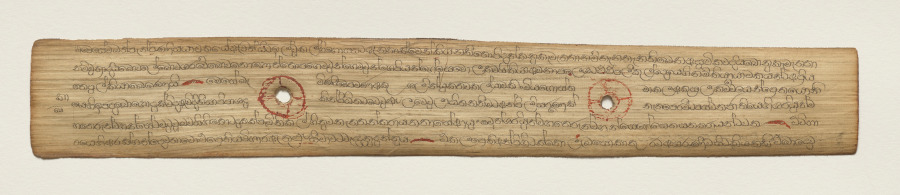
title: Leaf from a Buddhist Manuscript (recto)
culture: Sri Lanka, Singhalese, Late 17th century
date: c. 1700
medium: fiber paper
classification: Manuscript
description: Palm leaf material is still used for manuscripts in Sri Lanka. The palm leaves are prepared first by boiling them, drying them in the sun, and then rubbing them with oils. Scribes then use a metal stylus to incise the text. Then charcoal powder is wiped across the pages, filling in only the inscribed lines.